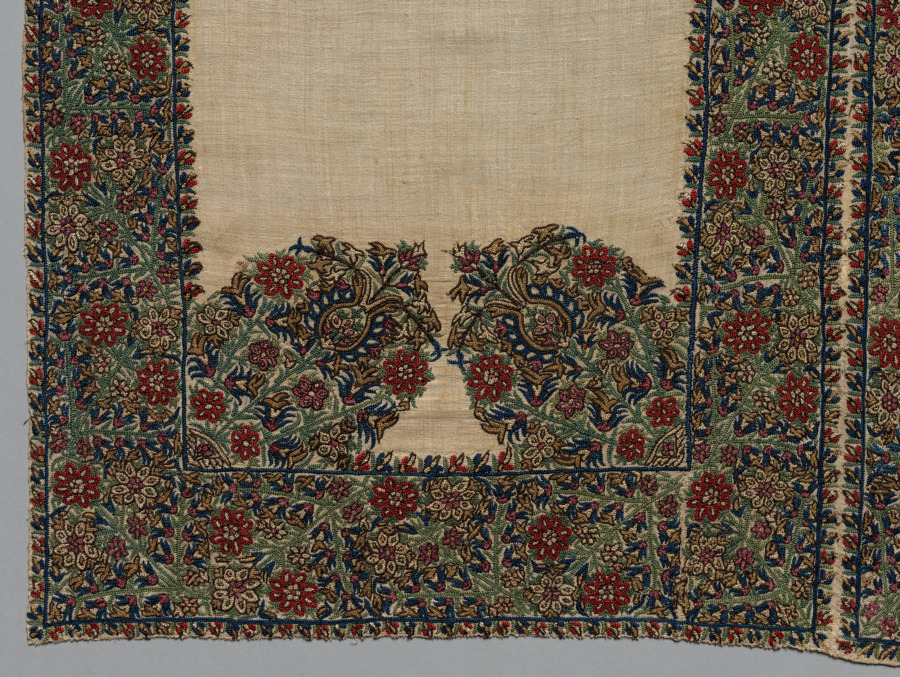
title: Front and Back of a Bolster Case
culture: Greece, Epirus, Yaninna, 18th century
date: 1700s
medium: embroidery: silk on linen tabby ground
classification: Embroidery